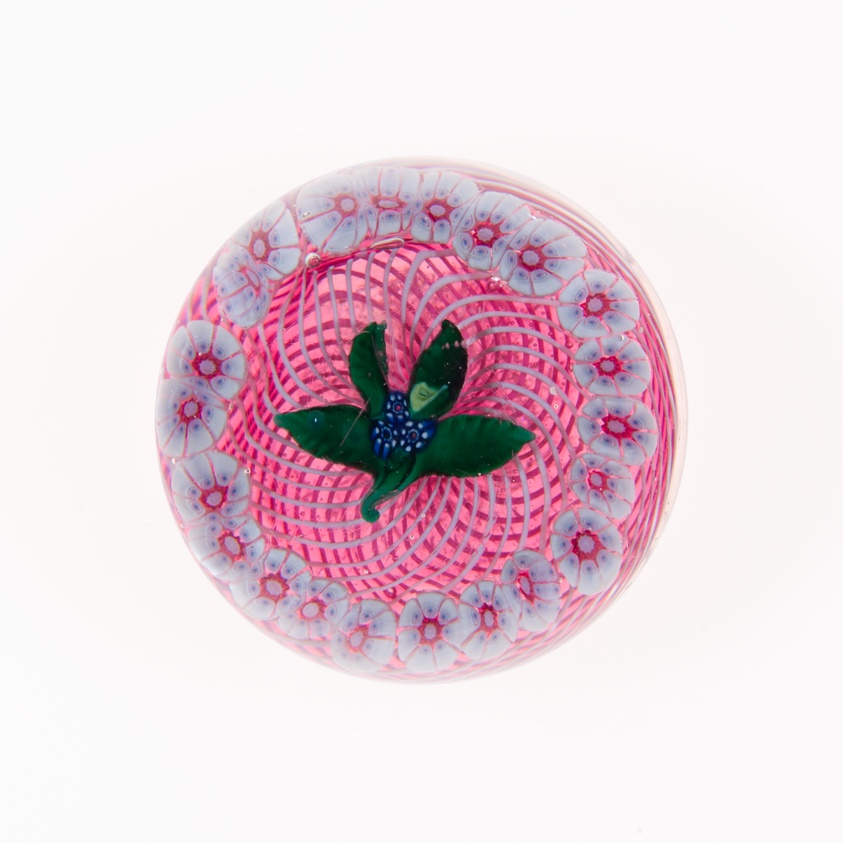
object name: Glass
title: Paperweight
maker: Gilliland Glass Manufactory (American, founded 1820)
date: c. 1880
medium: Glass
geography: New York City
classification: paperweight; fauna/flora/fruit; european decorative arts; glass